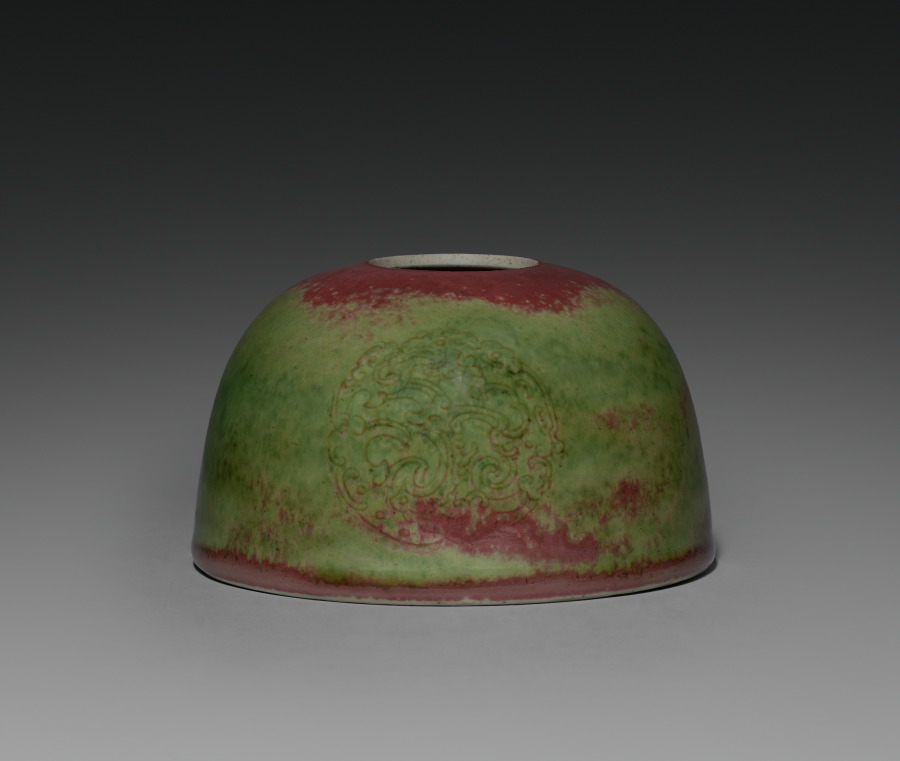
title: Water Pot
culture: China, Jiangxi Province, Jingdezhen, Qing dynasty (1644–1911), Kangxi period (1662–1722)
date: 1662–1722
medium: porcelain with "peach bloom" glaze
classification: Ceramic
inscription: 大清康熙年制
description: The "peach-bloom" glaze developed during the Kangxi era has been described as "drunken with beauty." The water pot's glaze is in shades ranging from red to grayish rose. The interior and base are covered in white glaze.